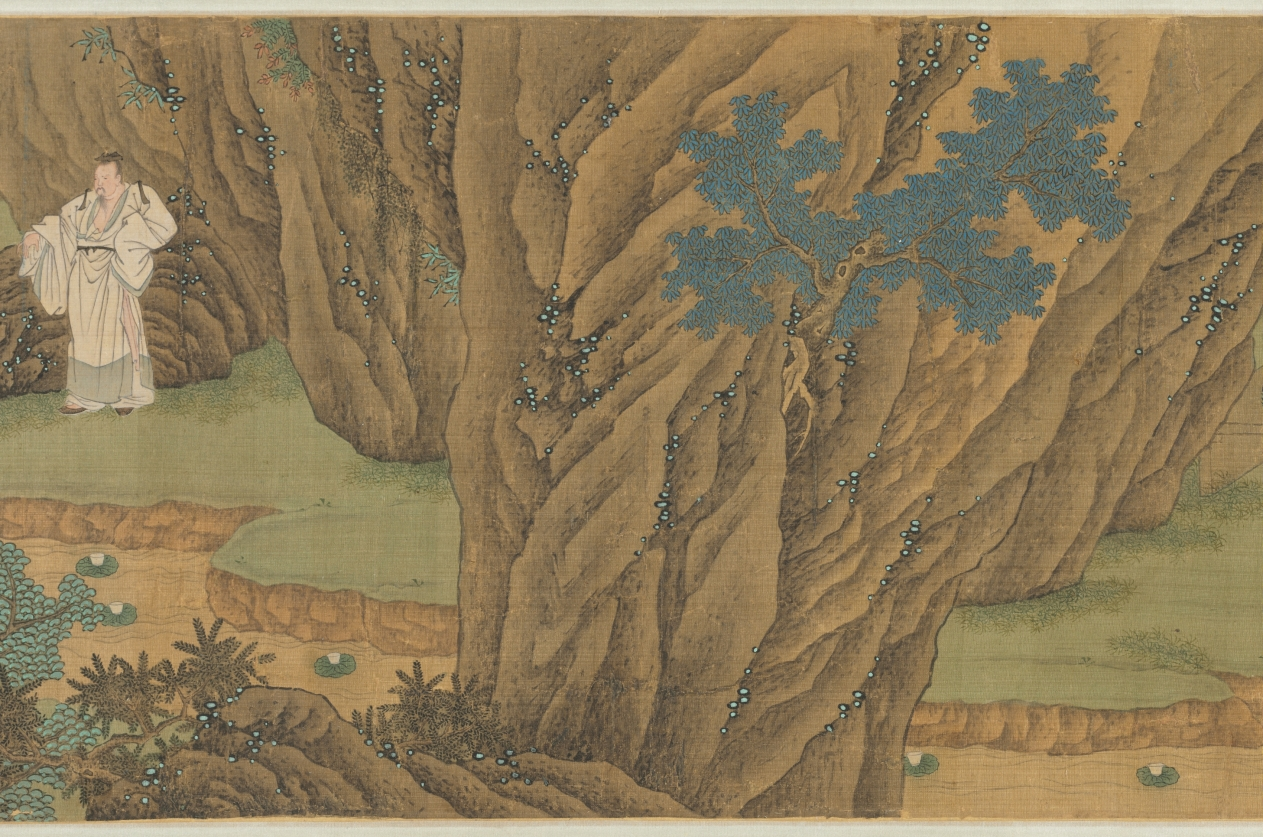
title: Purification at the Orchid Pavilion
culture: China, Qing dynasty (1644-1911)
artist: Fan Yi (Chinese, c. 1615–before 1688)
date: 1671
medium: Handscroll; ink and color on silk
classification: Painting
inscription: Artist's inscription, signature, and 2 seals: Painted by Fan Yi of Zhongfu during the second month of winter of the xinhai year [1671]. [2 seals] Fan Yi zhi yin, Zi yu yi.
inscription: Title on the frontispiece by Monk Yueshan (1629-1709).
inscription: 3 colophons and 13 additional seals: 1 colophon, dated 1707, and 6 seals of Yueshan; 2 colophons and 3 seals of Wong Kwan-Shut (Huang Junshi) 黃君實 (b. 1934); 2 seals of Fu Shen 傅 申 (b. 1937); 2 seals of Tessai Tomioka 富岡鐵齋 (1836-1924).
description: By the 1600s, the historic gathering at Lanting, Zhejiang province, in 353 CE was a common theme in Chinese painting. Originally based on a composition attributed to Li Gonglin (1049– 1106), now lost, Wu school artists revived the theme. Fan Yi, the brother of the artist Fan Qi from Nanjing, used delicate brushwork and luminous colors to depict the spring gathering.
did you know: The gathering’s host is in the Orchid Pavilion at the end of the scroll, representing an episode known as “Wang Xizhi Watching the Geese 王羲之觀鵝圖.”